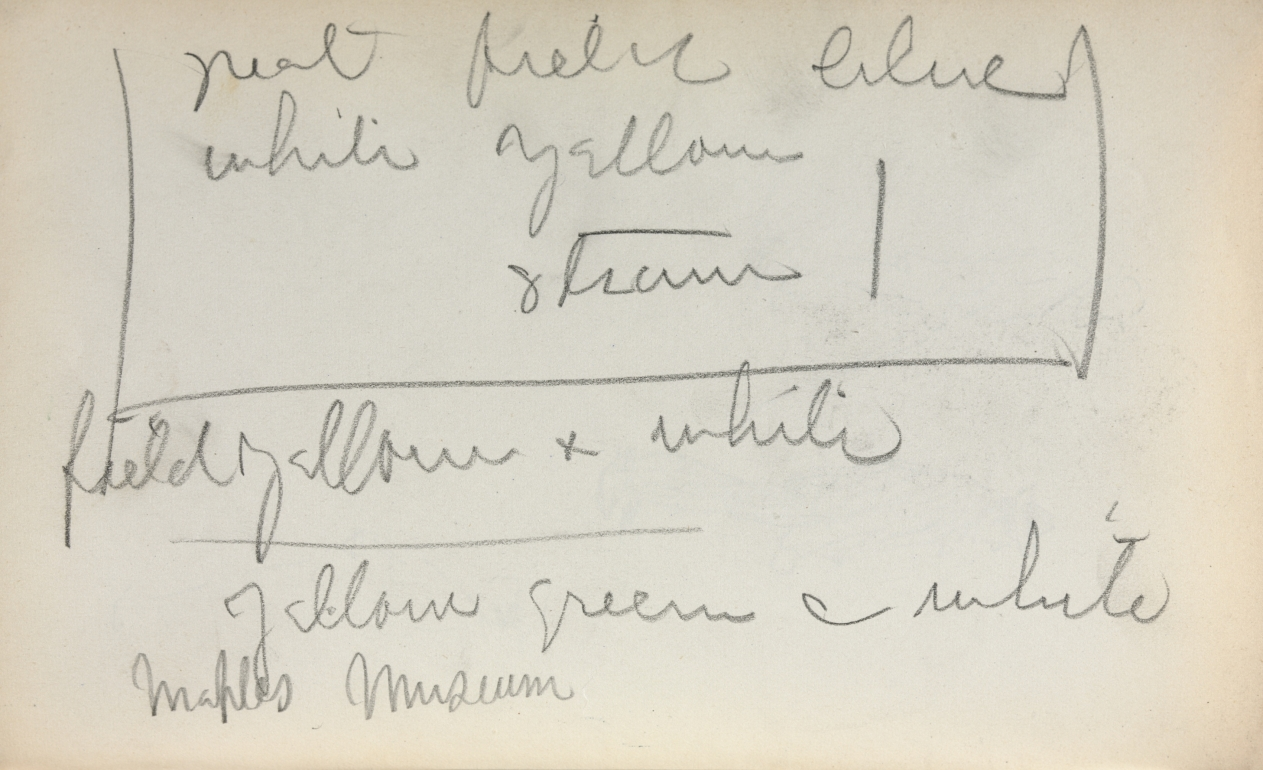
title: Italian Sketchbook: Notes (page 45)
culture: America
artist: Maurice Prendergast (American, born Newfoundland [now Canada], 1858–1924)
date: 1898–1899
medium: pencil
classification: Bound Volume